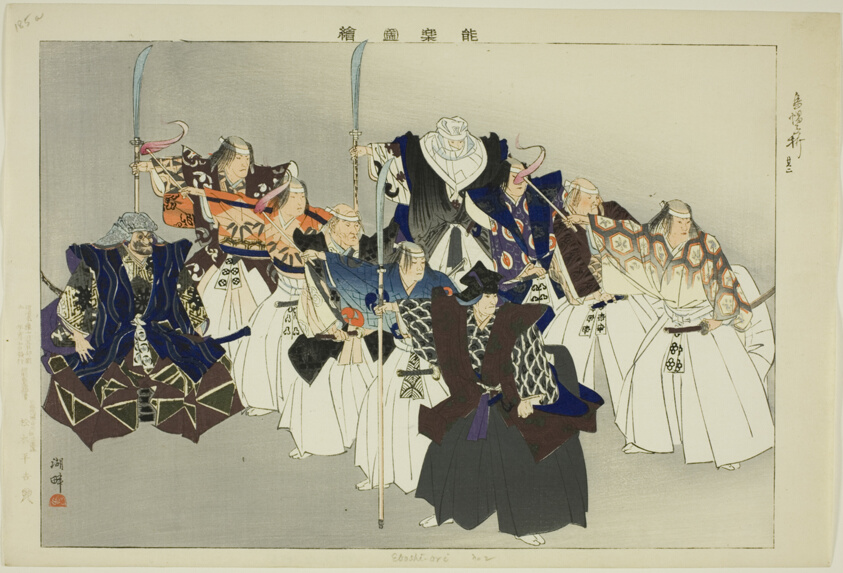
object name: Print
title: Eboshi-ori, from the series "Pictures of No Performances (Nogaku Zue)"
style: Japanese (culture or style)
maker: Tsukioka Kogyo; Japanese, 1869-1927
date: 1898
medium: Color woodblock print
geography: Japan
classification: woodblock print; print; asian art